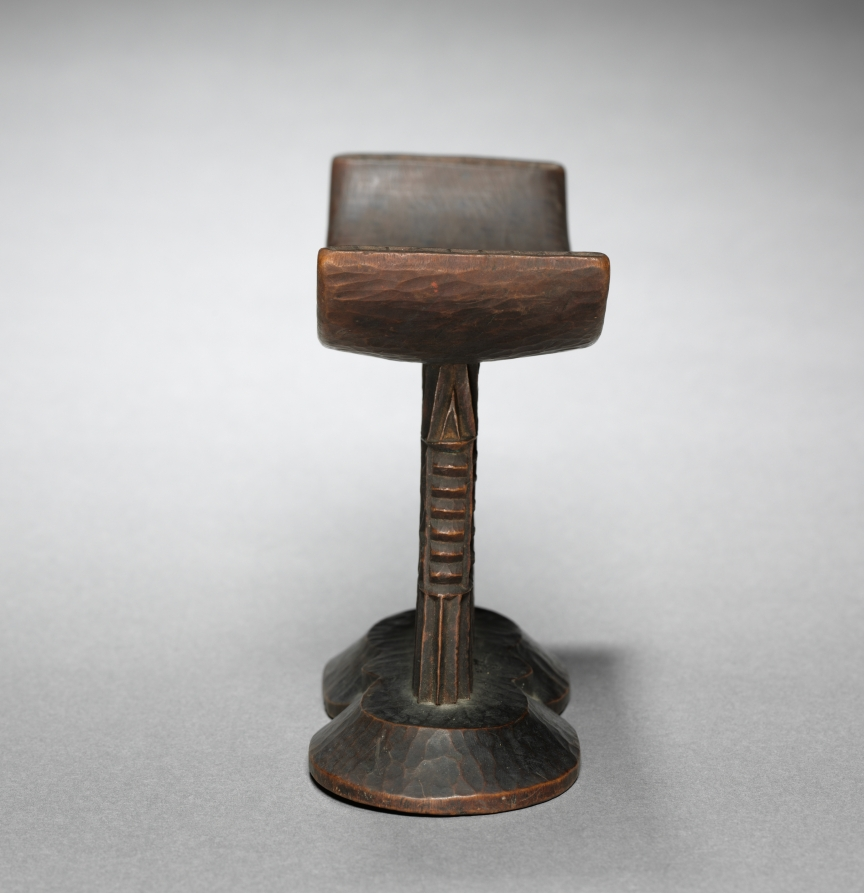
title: Headrest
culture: Southern Africa, Zimbabwe or Mozambique, Shona-style blacksmith-carver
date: c. 1910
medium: wood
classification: Furniture and woodwork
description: Headrests allowed Shona men to protect their elaborate braids. Placed under the neck or chin, frequent contact with hair and hairdressing products darkened its top. Tool marks show how it was smoothed only where the skin would make contact. Linked intimately to their owner, headrests often became burial goods or heirlooms. Recent research suggests Shona headrests symbolized women; small projections on the supports likely reference scarification marks worn by women of marrying age. As only mature men used headrests, it reinforces their female symbolism and women’s societal importance as wives.